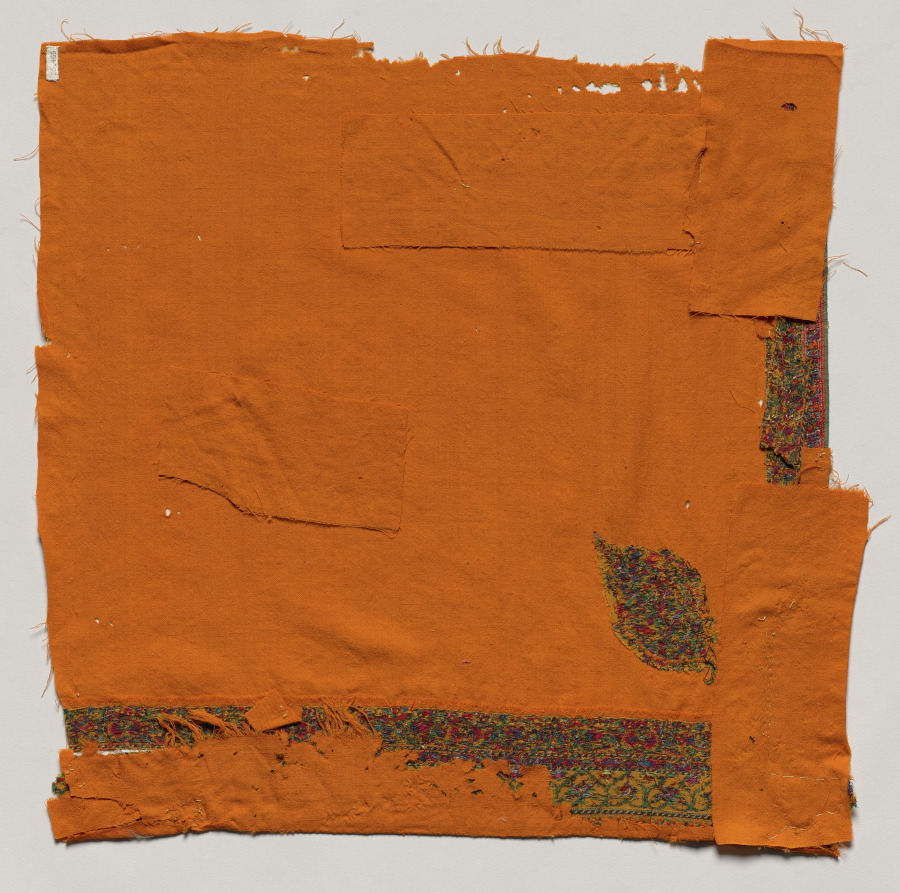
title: Corner of Fragment of a Shawl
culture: India, Kashmir, 20th century (?)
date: 1900–1924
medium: wool: tapestry twill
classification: Textile